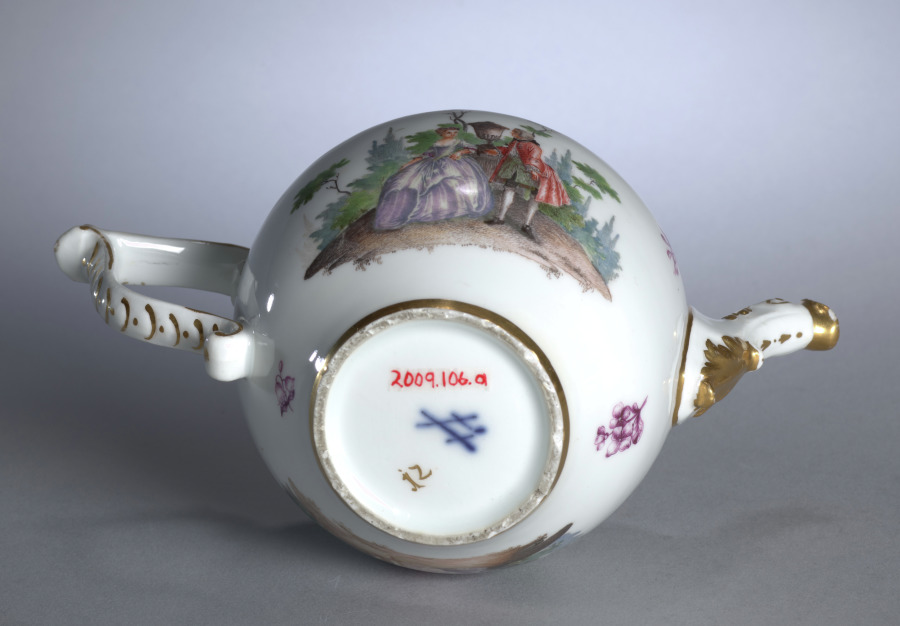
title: Teapot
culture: Germany, Meissen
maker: Meissen Porcelain Factory (German, est. c. 1710)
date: c. 1750–70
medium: porcelain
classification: Ceramic